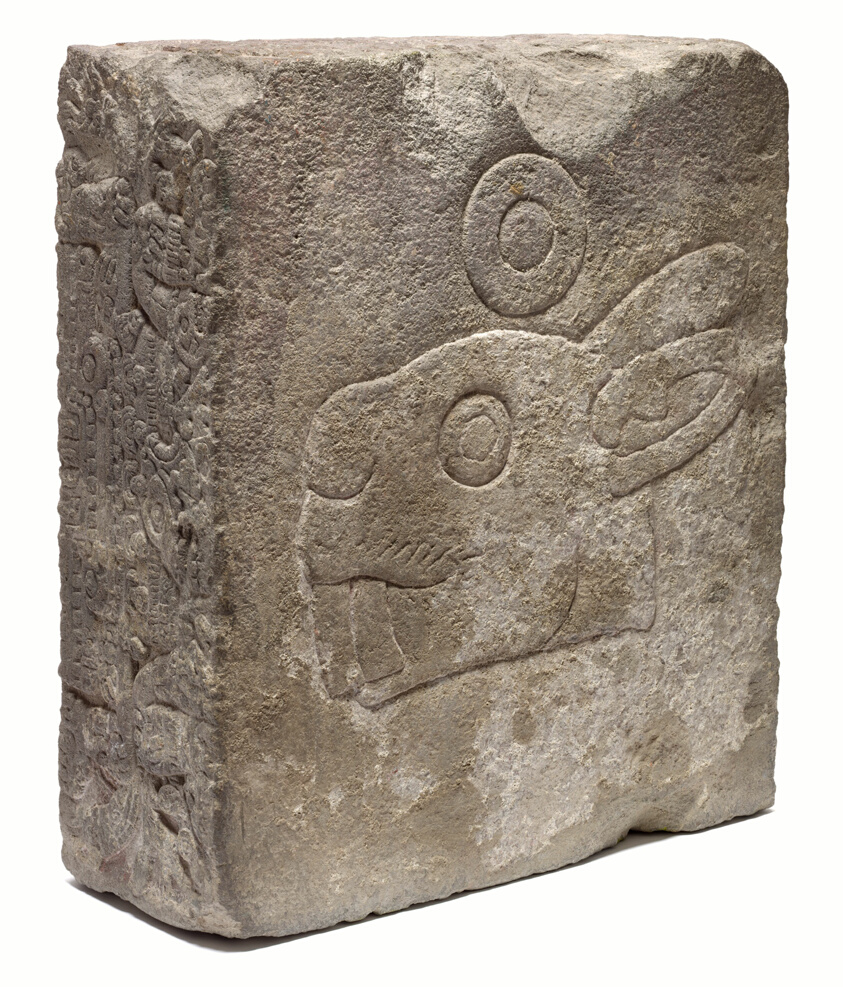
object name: Sculpture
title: Coronation Stone of Motecuhzoma II (Stone of the Five Suns)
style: aztec, mesoamerican, Pre-Columbian, americas, Arts of the Americas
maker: Aztec (Mexica) (Tenochtitlan, Mexico)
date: 1503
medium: Basalt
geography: Tenochtitlan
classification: ceremonial object; stone; art of the americas; sculpture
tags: architecture, history, coronations, animals, record of events, Hieroglyphs, Mexico, Aztecs, mythology, kingship, rulers (people), goddesses